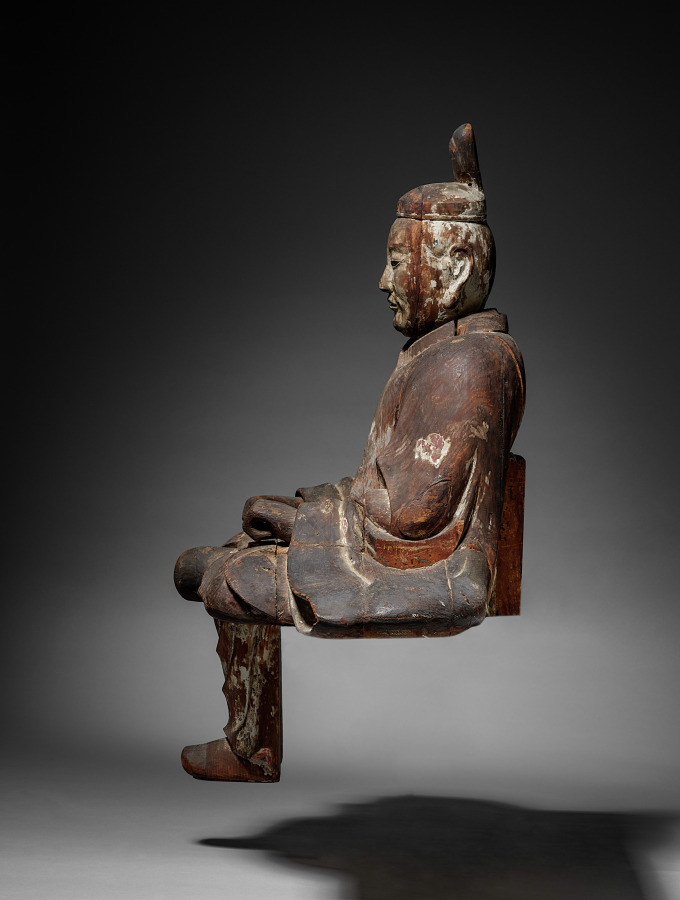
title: One of a Pair of Guardian Figures (Zuishin)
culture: Japan, Muromachi period (1392–1573) to Edo period (1615–1858)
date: c. 1560–1625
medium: Japanese cypress (hinoki) with traces of color; crystal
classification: Sculpture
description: Sculptors carved these two figures to look like members of the guard who protected the Japanese aristocracy in the 10th to 12th centuries. The pair belong in the roofed gate of a Shinto shrine. Their role was to embody the divine protectors of the deities, or kami, residing at the shrine. Their inset crystal eyes make them appear vigilant.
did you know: Some Japanese sculptors used to specialize in inset crystal eyes.